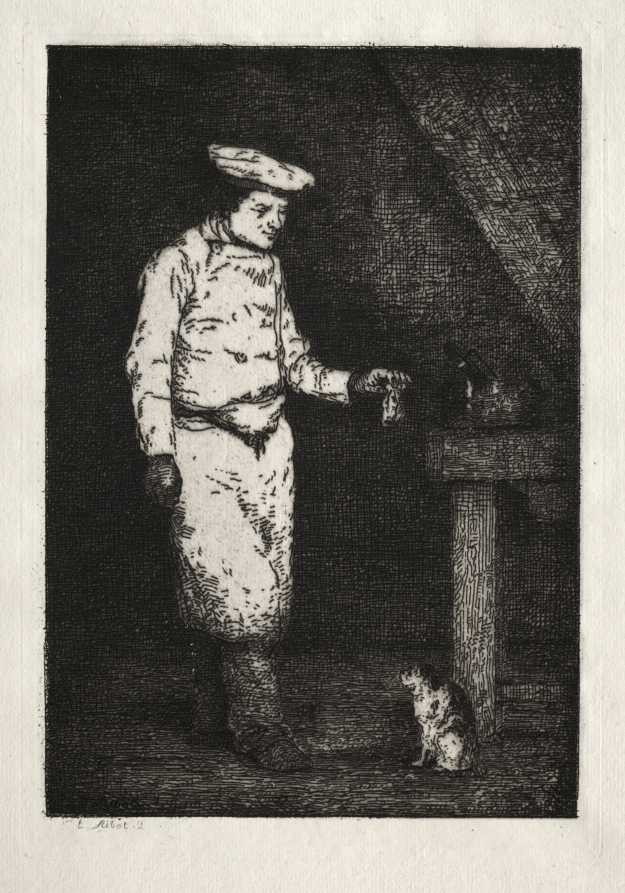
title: Le déjeuner du chat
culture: France, 19th century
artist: Théodule Ribot (French, 1823–1891)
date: 1867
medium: etching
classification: Print